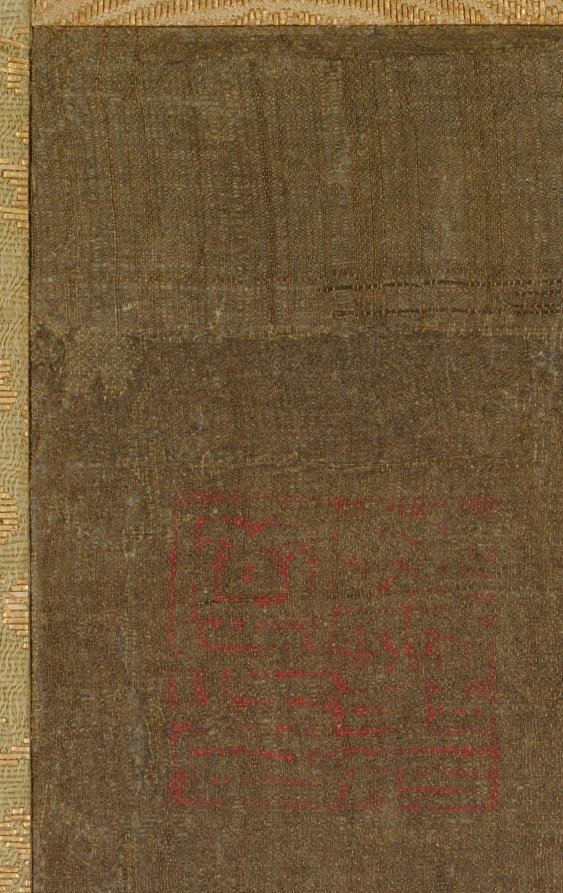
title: Dragon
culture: China, Southern Song dynasty (1127-1279)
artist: Fachang Muqi (Chinese, 1220–1280)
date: c. 1250–79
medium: Hanging scroll; ink on silk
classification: Painting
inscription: 道有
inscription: 雜華室印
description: The dragon and tiger are tied to the philosophical concept of yin and yang, which describes opposite but complementary forces. The dragon occupies a tiered background of waves and mist. Its luminous head emerges from the darker passages, and its narrow twisting body is serpent-like. By contrast, the close-up view of the tiger emphasizes its bulk. The tiger bends its head to lick its paw while its tail curls in the foreground. In their original Chan Buddhist context, this pair of scrolls likely flanked a central image, like the Bodhisattva Guanyin. The silk has darkened over the centuries, and the slight reddish shading in the tiger’s tongue and nose has faded.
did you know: Fachang Muqi was a Chinese Chan Buddhist monk and painter.